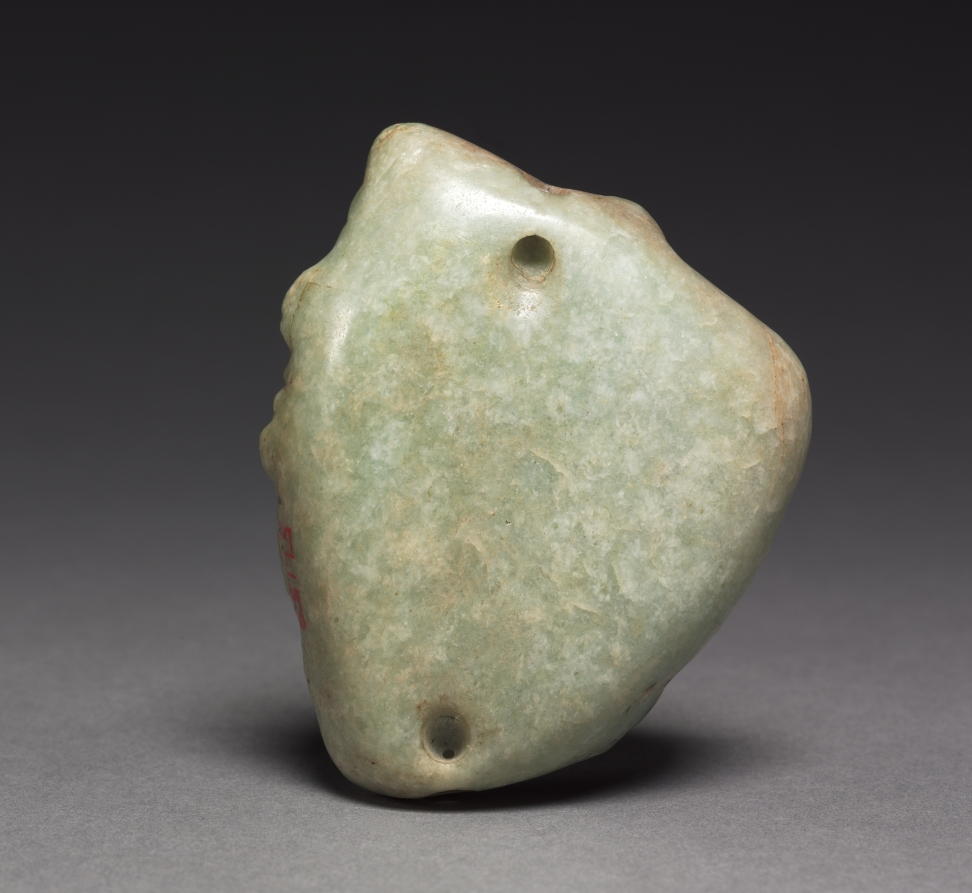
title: Deity Plaque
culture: Mexico or Central America, Maya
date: c. 300–600 CE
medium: jade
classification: Jade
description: Depicted as an elderly man with a conch shell on his back, this plaque probably portrays God N, the deity who supports the sky.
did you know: In ancient Mesoamerica, jade was more valuable than gold.